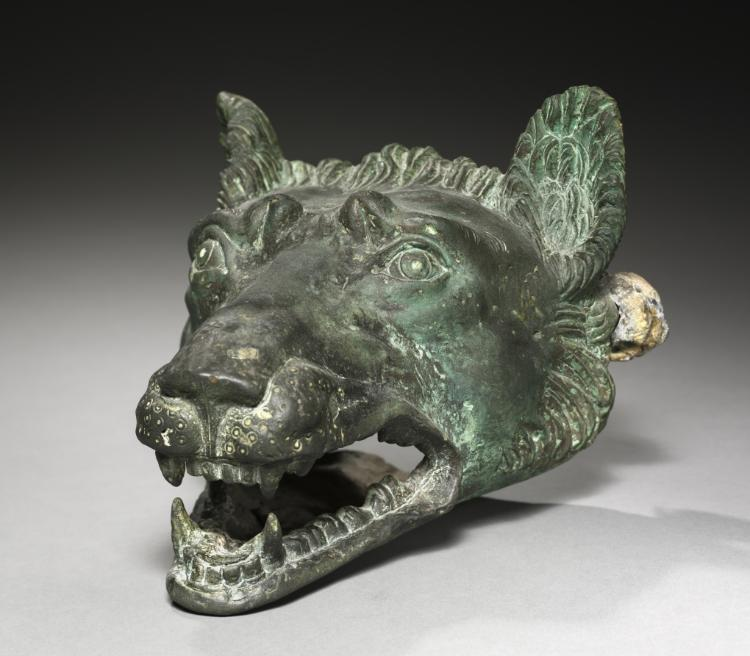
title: Wolf-Head Barge Fixture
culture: Italy, Rome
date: 1–100 CE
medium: bronze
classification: Sculpture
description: This snarling wolf head is closely similar to others that were attached to a luxurious pleasure barge moored on Lake Nemi, near Rome. The ship was designed as a floating platform for elaborate parties, and included impressive bronze fittings to ornament the wooden structure. Beam ends were capped with lion, panther, and wolf heads, each with a large bronze ring between its teeth.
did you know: The wolf is an important symbol of Rome, having reared its mythical founders, Romulus and Remus.